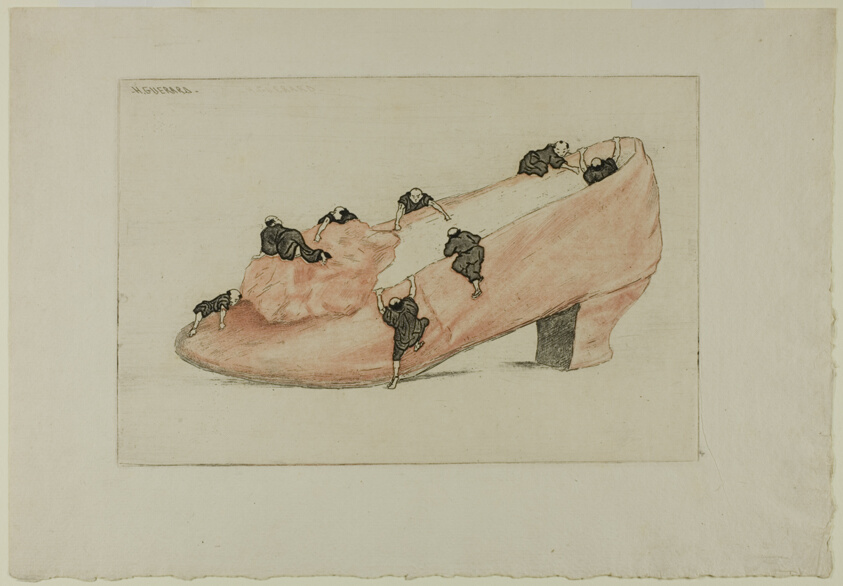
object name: Print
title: The Assault of the Shoe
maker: Henri Charles Guérard (French, 1846-1897)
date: 1888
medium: Etching, with open bite, in light red and black on cream laid paper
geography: France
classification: etching; paper; print; prints and drawing